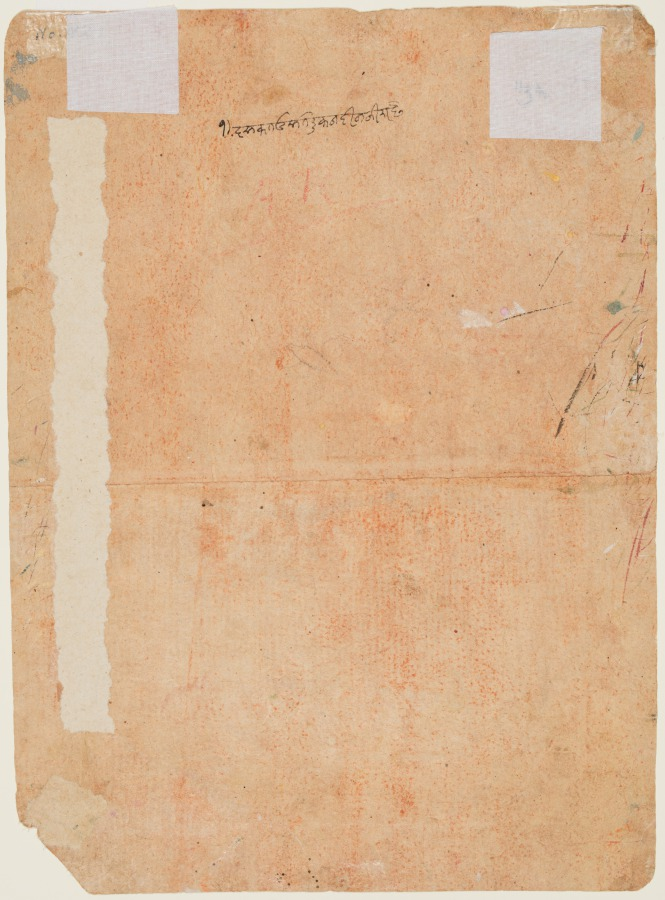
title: Maharaja Anup Singh of Bikaner (reigned 1669–98) Receives a Courtier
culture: Northwestern India, Rajasthan, Rajput Kingdom of Bikaner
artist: Ruknuddin (Indian, active c. 1666–97)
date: c. 1690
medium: Ink and gum tempera on paper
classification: Painting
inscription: Top: in Persian: 'dast-i ustā rukn al-dīn’ ‘eīn tasvīr māhārājā anūp siṃgh jīva’ ‘rabsh (?) khvās ado rām’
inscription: Verso: in Nagari: 'dastakata uste rukanadīna jī rā chai’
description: Ruknuddin is one of the most celebrated artists of the Bikaner painting atelier. His exquisite mastery of brushwork and portraiture can be noted even in the spontaneity of an informal study. From the same illustrious family of Bikaner artists, he was a second cousin of Nur Muhammad, who created the portrait drawing of Maharaja Rai Singh of Bikaner (1987.1100).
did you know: Areas of white indicate places where Ruknuddin made corrections; the king’s right foot, for example.